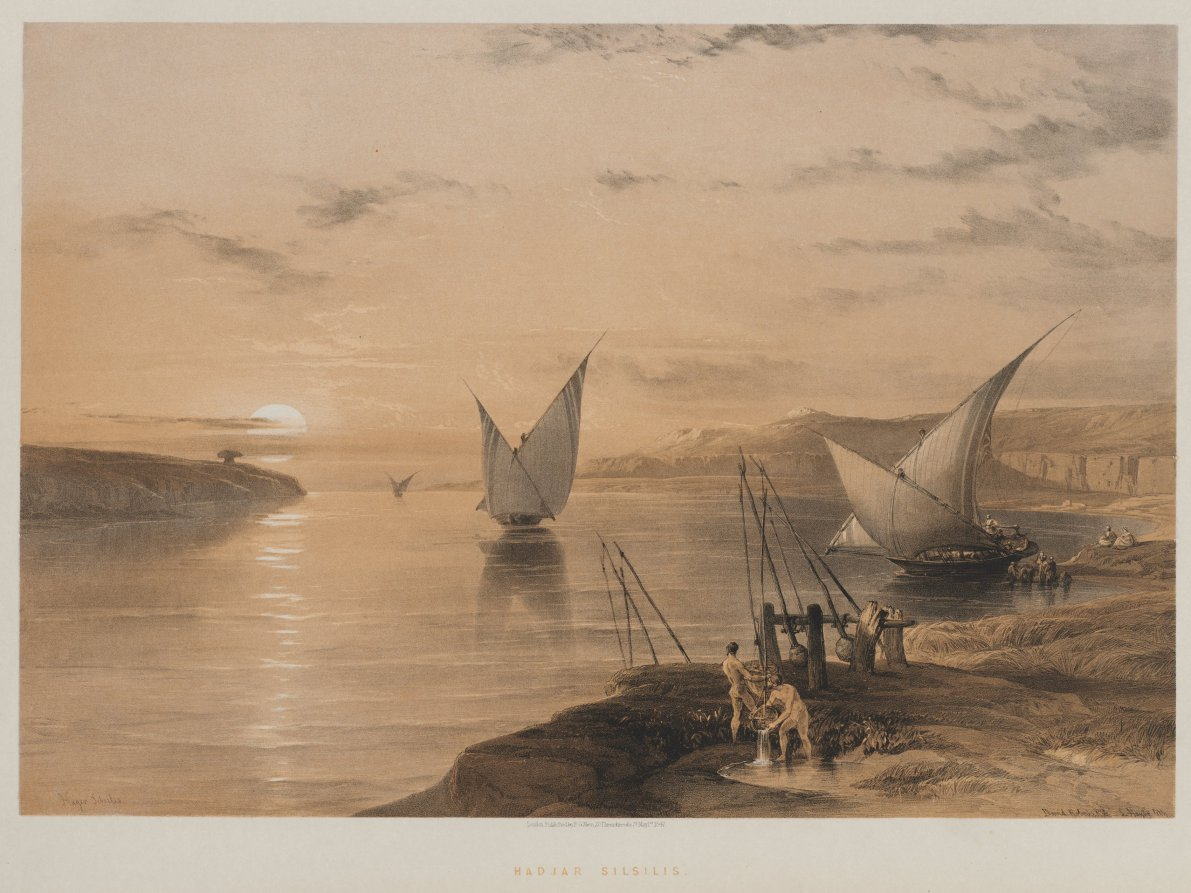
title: Egypt and Nubia, Volume II: Hagar Setsilis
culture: England, 19th century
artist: Louis Haghe (British, 1806–1885)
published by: F. G. Moon, 20 Threadneedle Street, London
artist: after David Roberts (Scottish, 1796–1864)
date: 1847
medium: color lithograph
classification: Print